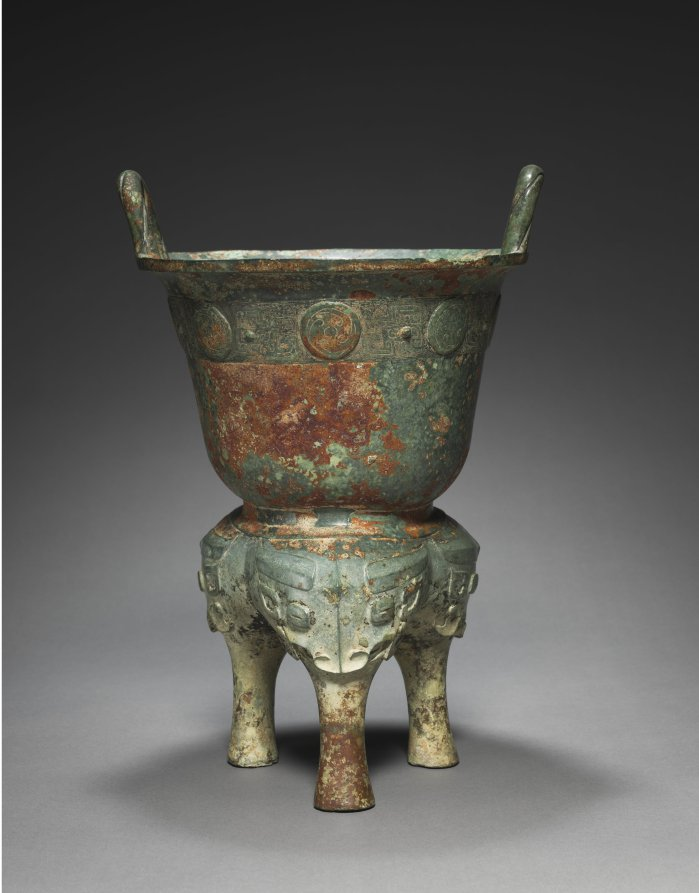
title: Food Steamer (Xian)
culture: China, Shang dynasty (c. 1600–c. 1046 BCE), Anyang phase (c. 1250–1046 BCE) to Western Zhou dynasty (c. 1046–771 BCE)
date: c. 1000 BCE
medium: bronze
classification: Metalwork